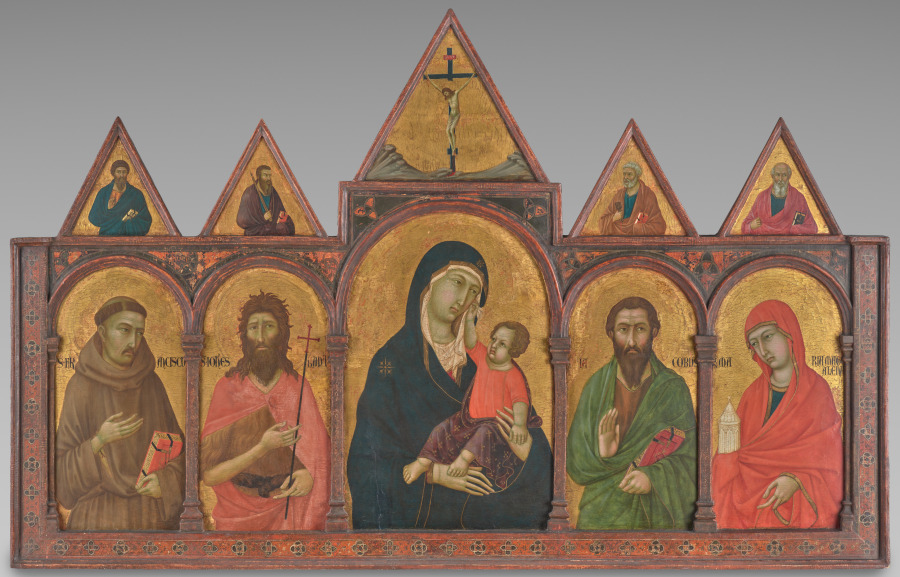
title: Virgin and Child with Saints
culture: Italy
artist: Ugolino di Nerio (Italian)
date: c. 1320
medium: tempera and gold on wood panel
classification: Painting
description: In medieval Italian churches, painted altarpieces served as the focal point for worshippers during the rituals of faith. The figures of Jesus, Mary, and eight saints are framed by a golden background that would have glistened in the flickering candlelight of the church.